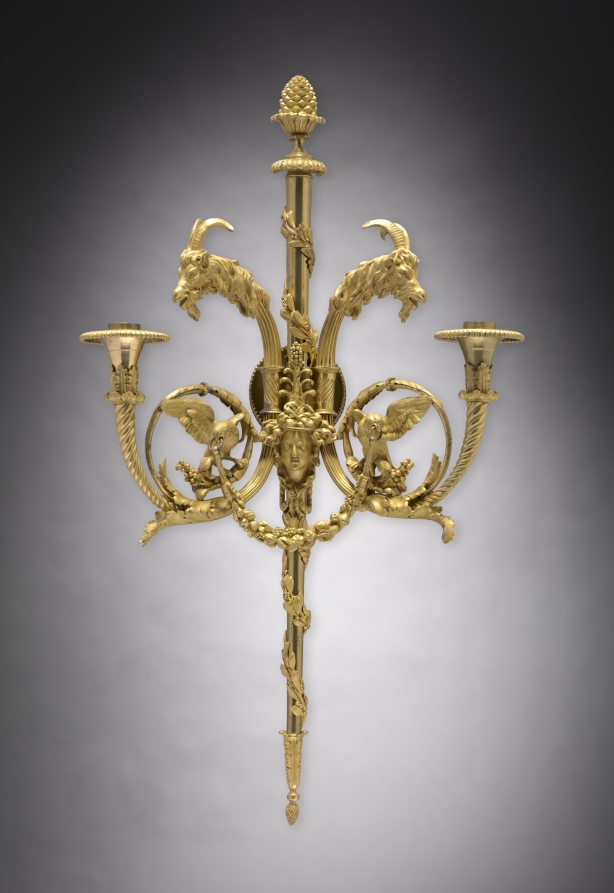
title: Candle Bracket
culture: France, style of Louis XVI, 18th Century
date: c. 1780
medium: gilt bronze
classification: Furniture and woodwork